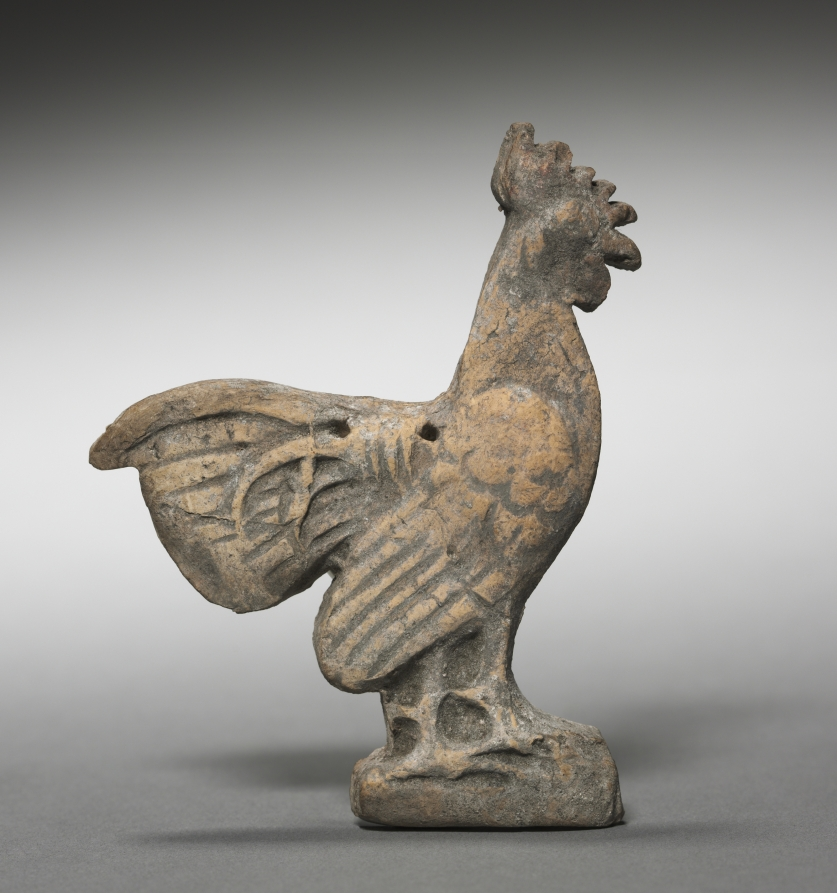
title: Cock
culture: Greece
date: 500s BCE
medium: terracotta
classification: Sculpture